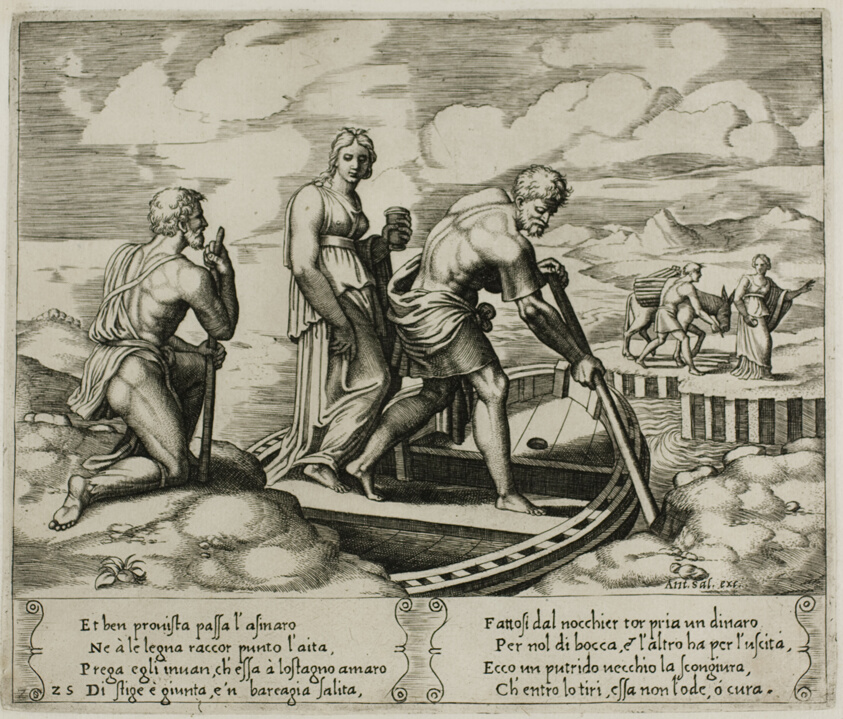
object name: Print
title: Psyche Embarks in Charon's Boat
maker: Master of the Die (Italian, active c. 1530-1560); after Michiel Coxcie I (Flemish, 1499-1592); in turn, inspired by Raffaello Sanzio, called Raphael (Italian, 1483-1520)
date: 1530/40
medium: Engraving in warm brown ink on cream laid paper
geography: Italy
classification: engraving; print; prints and drawing